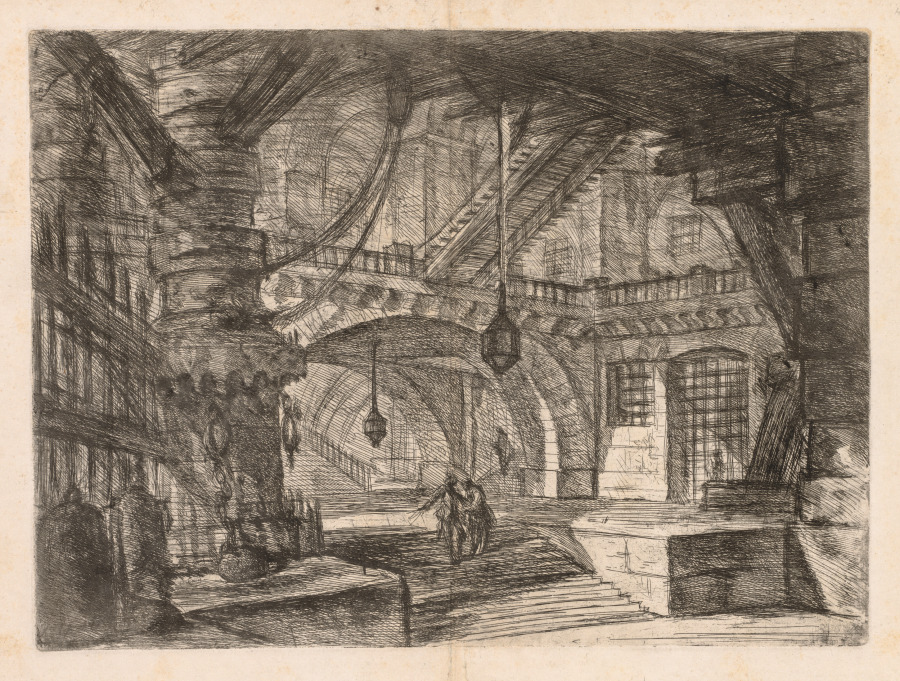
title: The Prisons: A Wide Hall with Lanterns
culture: Italy, 18th century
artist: Giovanni Battista Piranesi (Italian, 1720–1778)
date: 1745–1750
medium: etching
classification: Print